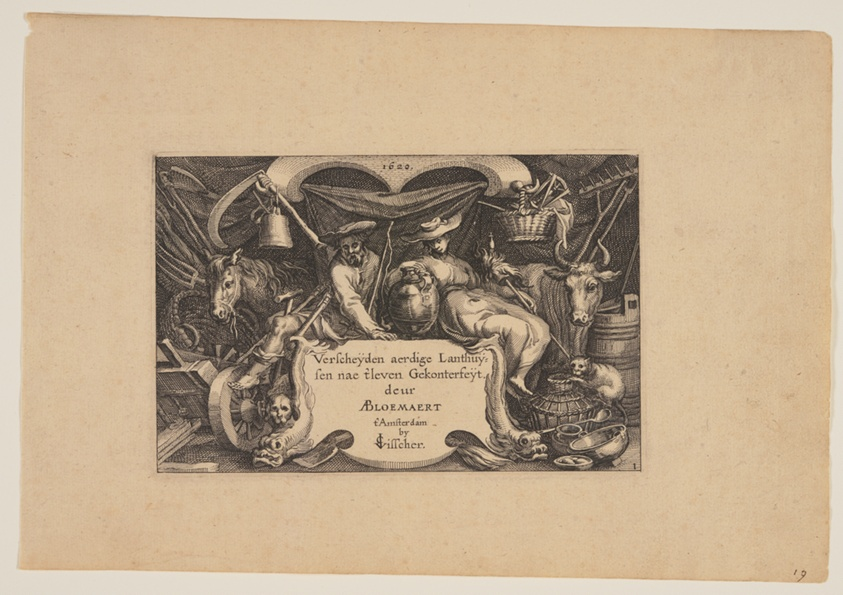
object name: Print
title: Title-page, from Landscapes (Verscheyden aerdige Lanthuysen...)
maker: Claes Jansz. Visscher (Netherlandish, c. 1550–c. 1612); after Abraham Bloemaert (Dutch, 1566–1651)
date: 1620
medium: Etching on ivory laid paper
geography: Netherlands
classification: print; paper; prints and drawing; etching